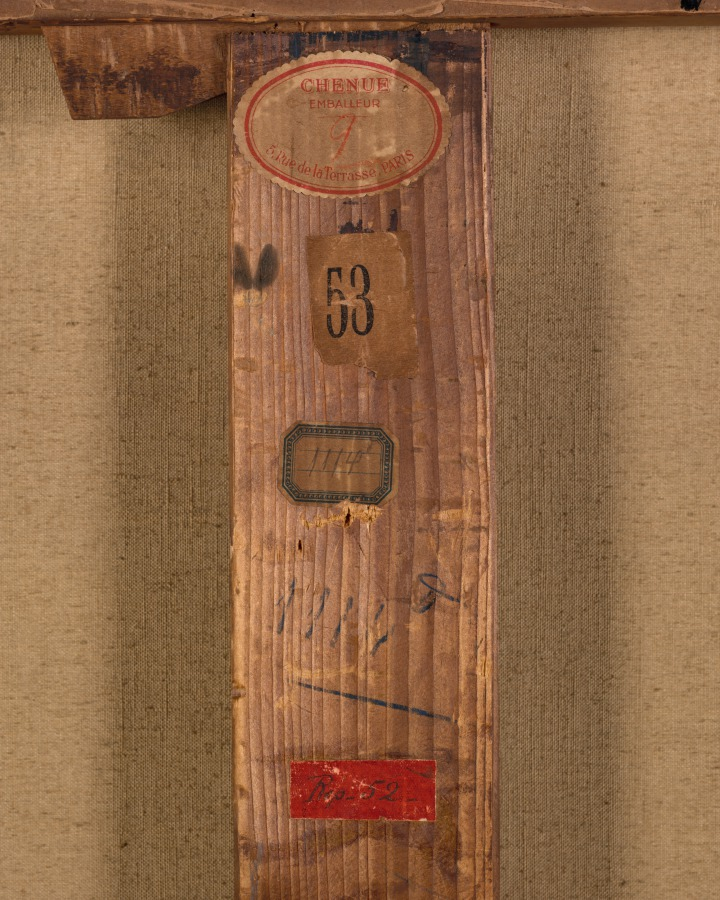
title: The Call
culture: France, late 19th-early 20th Century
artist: Paul Gauguin (French, 1848–1903)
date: 1902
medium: oil on fabric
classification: Painting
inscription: Signed lower right: P. Gauguin / 1902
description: Painted on a remote island in Polynesia a year before the artist's death, The Call belongs to a series of late works that explore the mysteries of life and death. Two women stand with bare feet, as if on sacred ground. One woman gestures to someone outside the picture, perhaps responding to a "call" from fate or destiny. Gauguin realized his ambition of painting from memory and the imagination through such mysterious, dreamlike images.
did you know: Although known as one of the founders of modern art, Gauguin found inspiration in ancient Greek, Roman, and Egyptian art. The woman with the pointing finger on the right side of this painting was taken from a figure on the Parthenon frieze.